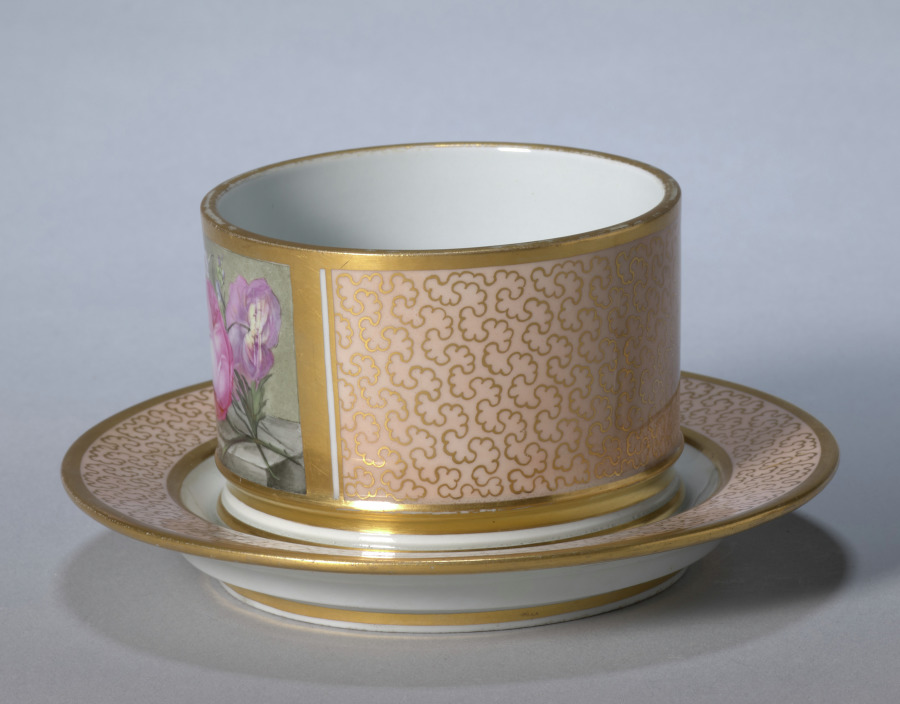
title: Dish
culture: England, Worcester, early 19th Century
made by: Worcester Porcelain Factory (British, established 1751)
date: c. 1810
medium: soft-paste porcelain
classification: Ceramic